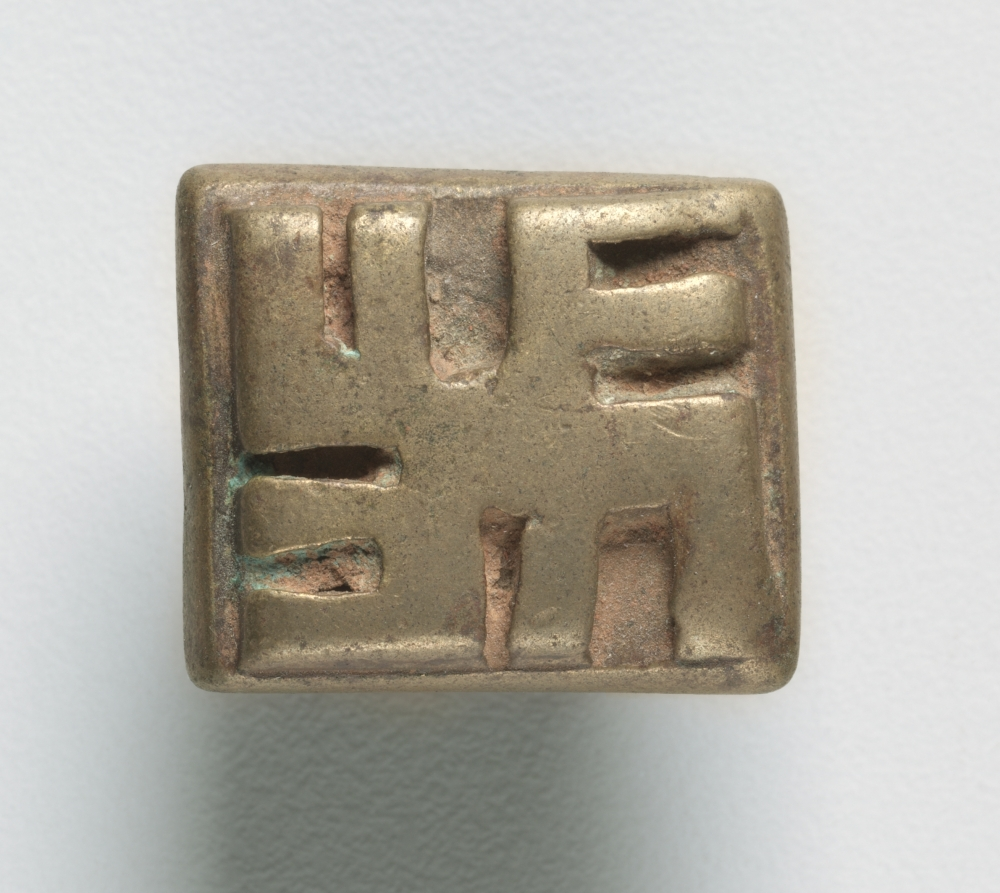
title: Gold Weight (abrammuo): Geometric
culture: Africa, West Africa, Ghana, Asante goldsmith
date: 1800s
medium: Copper alloy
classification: Implements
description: The wealth and power of the Asante kingdom was derived primarily from its massive gold resources. Since at least 1600, small weights in brass and bronze were used to weight gold dust and nuggets. The royal court had the most elaborate store of weights, while commoners often had about a dozen. Their imagery falls into two broad cateogries: geometric and representational. The latter often refers to proverbs, which used judiciously, marked a wise person.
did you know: Geometric weights like this are the earliest form of these small, functional objects.